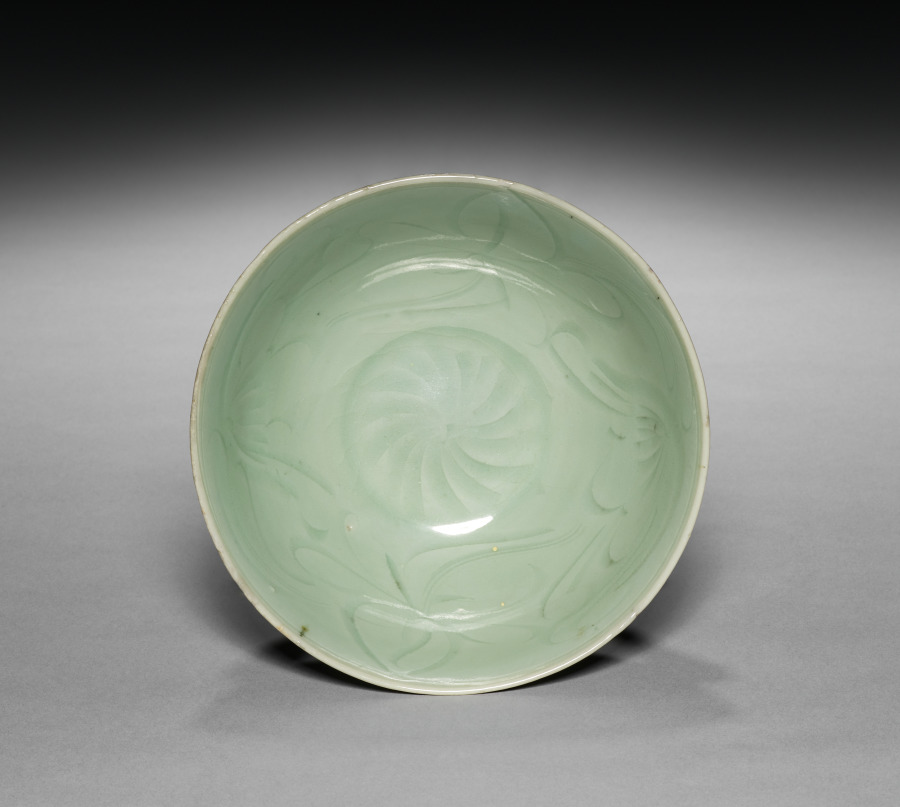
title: Bowl with Carved Lotus Design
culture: China, Southern Song (1127–1279) to Yuan dynasty (1279–1368)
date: 1100s–1300s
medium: Stoneware with pale green (celadon) glaze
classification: Ceramic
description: This pale green–glazed bowl is decorated with a medallion at the center and a lotus motif on the inside and outside walls. China’s increasingly prosperous ceramic industry began exporting green stoneware during the Tang dynasty (618–906) as far as North Africa. Imitations in Korea, Japan, Southeast Asia, and the Middle East are evidence of its popularity and enormous success as export ware.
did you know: In Chinese Buddhist culture, the lotus flower symbolizes good fortune and the process of achieving spiritual enlightenment.